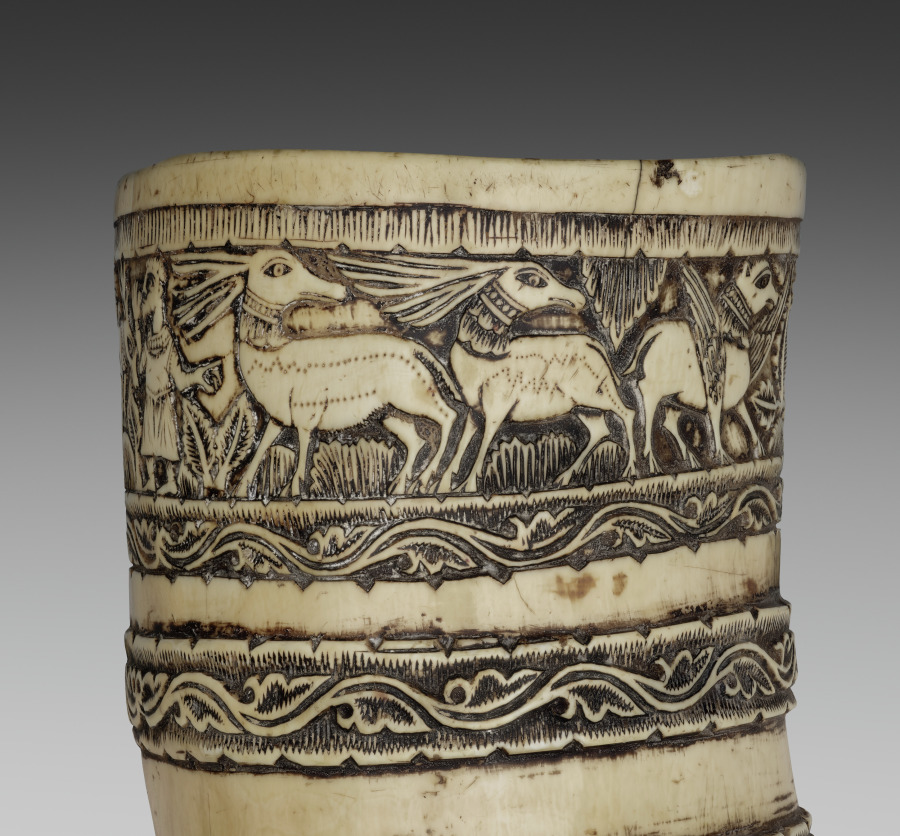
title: The So-called Horn of Saint Blaise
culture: South Italy or Sicily, 12th century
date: 1100–1200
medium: ivory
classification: Ivory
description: This oliphant--a carved elephant tusk in the shape of a hunting horn--was likely carved in an Arab ivory workshop in South Italy or Sicily. It is masterfully shaped, with a series of six carved bands, the outer ring depicting scenes from a hunt. The earliest surviving inventory of the church of Saint Blaise from 1482-85 lists an oliphant decorated with silver rings and precious stones and known as the "Horn of Saint Blaise." By the 17th century, Saint Blaise was reputed to have used this very horn to summon the faithful to worship.